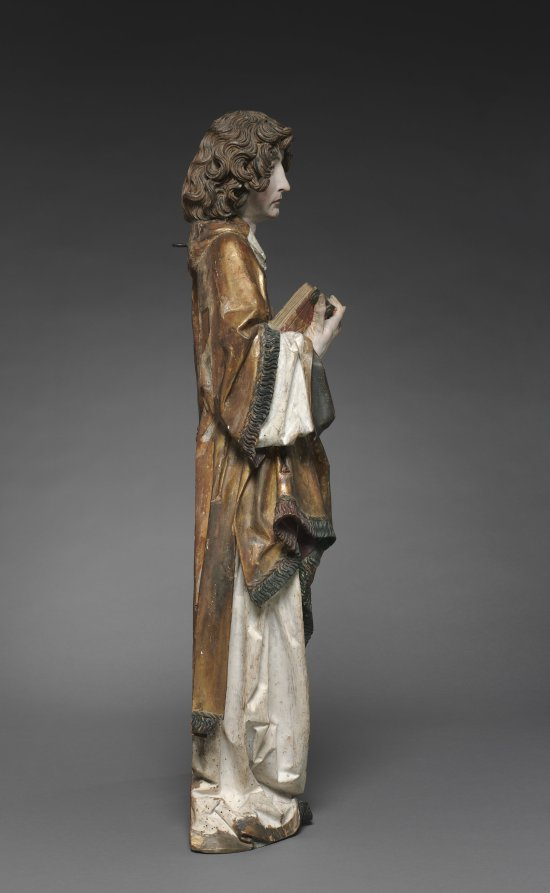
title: Saint Lawrence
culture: Germany, Würzburg, 16th century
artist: Tilman Riemenschneider (German, active Würzburg, c. 1460–1531)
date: 1502–8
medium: lindenwood with polychromy and gilding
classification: Sculpture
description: This sculpture, along with that of Saint Stephen (1959.43), and two female saints preserved in Frankfurt (Historisches Museum), are believed to be the remaining fragments of a large altarpiece carved by Riemenschneider for the Dominican convent in Rothenburg in Franconia (demolished in 1813). Saints Stephen and Lawrence both wear the dalmatic to indicate their status as deacons in the early church. Each holds a symbol of his martyrdom; here, Saint Lawrence holds a grill to indicate his death by burning. Late Gothic Style Art in Germany through the early 1500s remained firmly anchored in the late Gothic style with its associated interests in realism. Riemenschneider was one of the most prolific and versatile sculptors of this style, a recognized master in both stone and wood. His flourishing workshop employed as many as 40 apprentices in sculpting, woodcarving, and painting. His sculptures are noted for the dreamy, melancholy, and introspective quality in their expressions, as well as their remarkable attention to detail.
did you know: Before Riemenschneider finally settled in Würzburg, Germany, in 1484, he traveled to Strasbourg and Colmar, where he became acquainted with the works of the engraver Martin Schongauer.